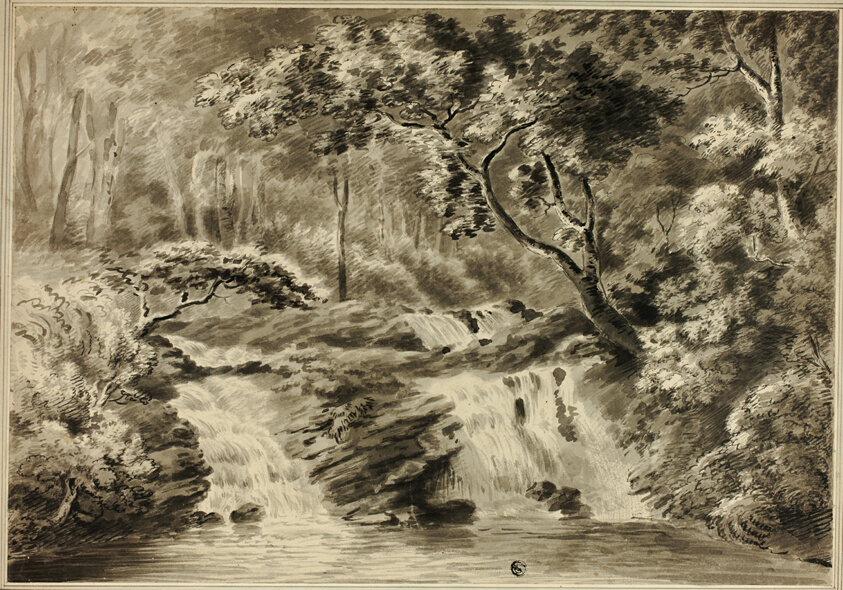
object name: Drawing and Watercolor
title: Waterfalls and Woods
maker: Style of Amos Green (English, 1735-1807)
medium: Pen and black ink and brush and black and gray wash on cream wove paper, laid down on cream wove paper, laid down on cream wove paper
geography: United Kingdom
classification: ink or chalk wash; paper; brush and wash; pen and ink drawings; drawings (visual works); prints and drawing